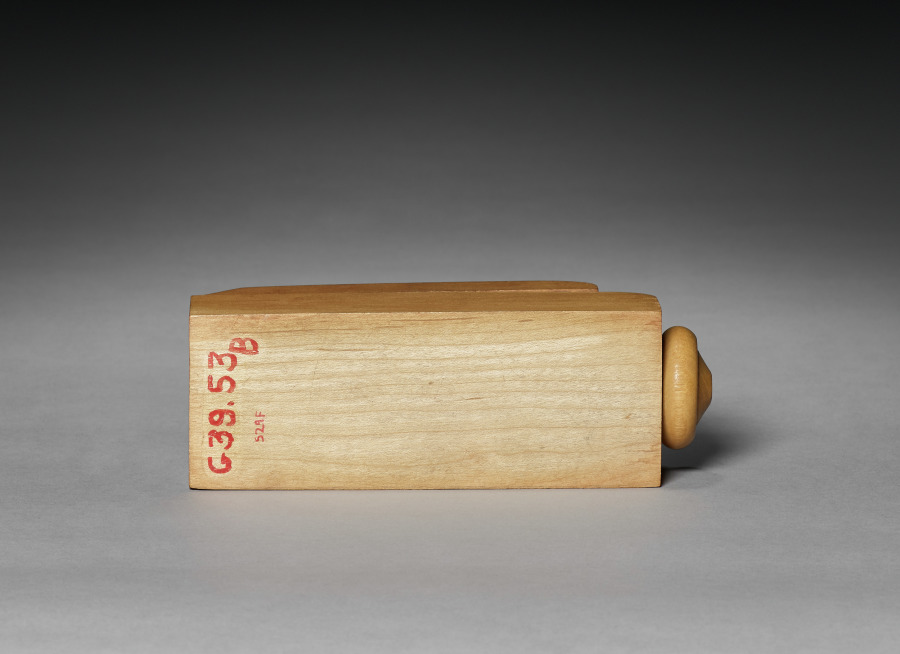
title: Boysen Toys (car)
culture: Denmark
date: 1900s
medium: Wood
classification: Wood